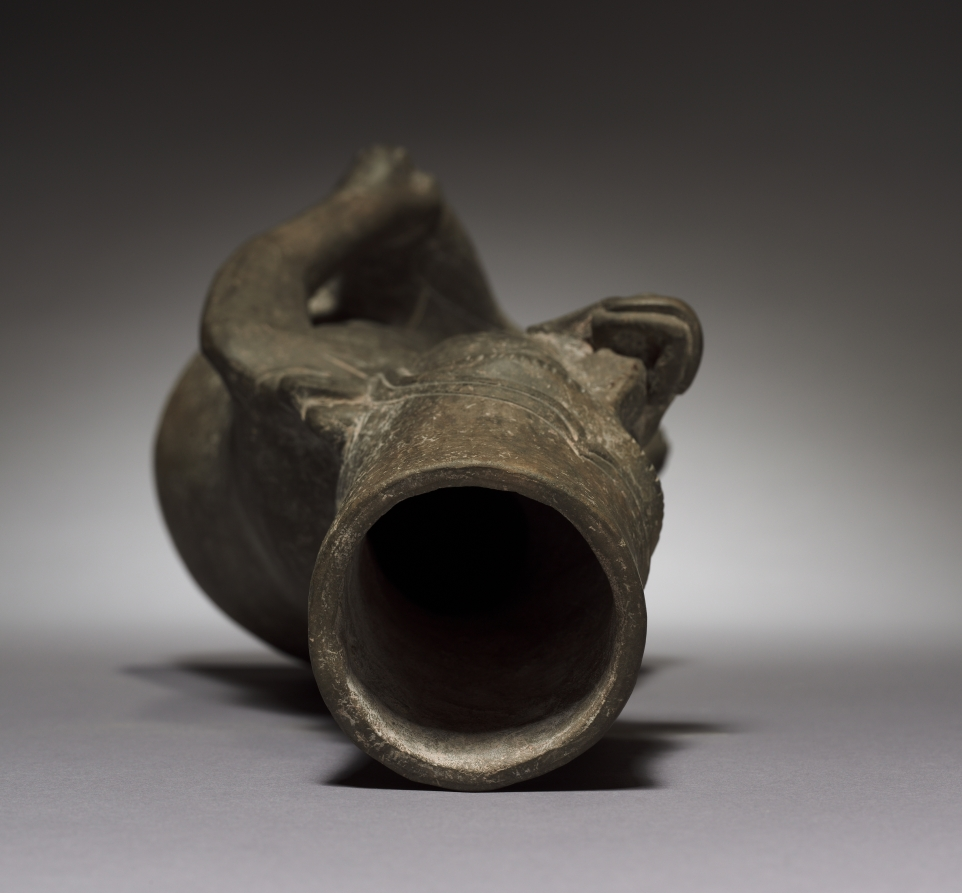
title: Urn Figure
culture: Mexico, Oaxaca, Zapotec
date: c. 150 BCE–200 CE (thermoluminescence date, 60 BCE–642 CE)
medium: earthenware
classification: Sculpture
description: This simply posed and costumed urn figure represents a goddess, or perhaps an ancestress. Early Zapotec ceramic art has a spare elegance that contrasts strongly with the florid ornamentation of later works.